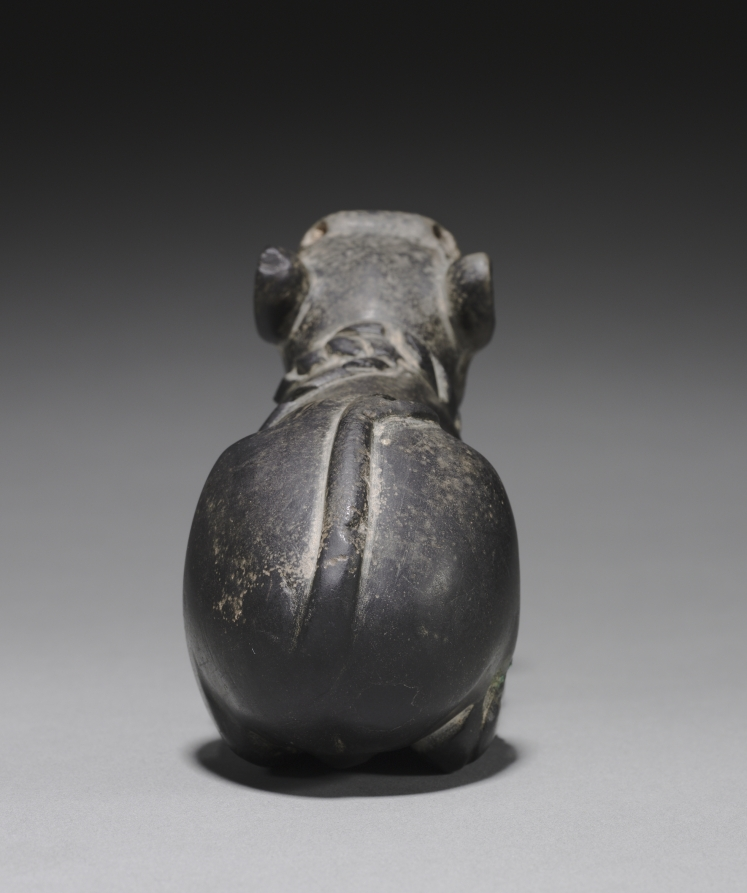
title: Bull Calf Polemount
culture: Sumerian, Iraq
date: c. 2700 BCE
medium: basalt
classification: Sculpture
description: Like most Mesopotamian sculptures in the round, this small bull was an object of worship in a temple. Its eyes, the triangle on the forehead, and the stripes in the rope were originally embellished with contrasting colored stones, or bone. The inlays are lost, but the sculpture itself is one of the very few original cult statues that have survived.